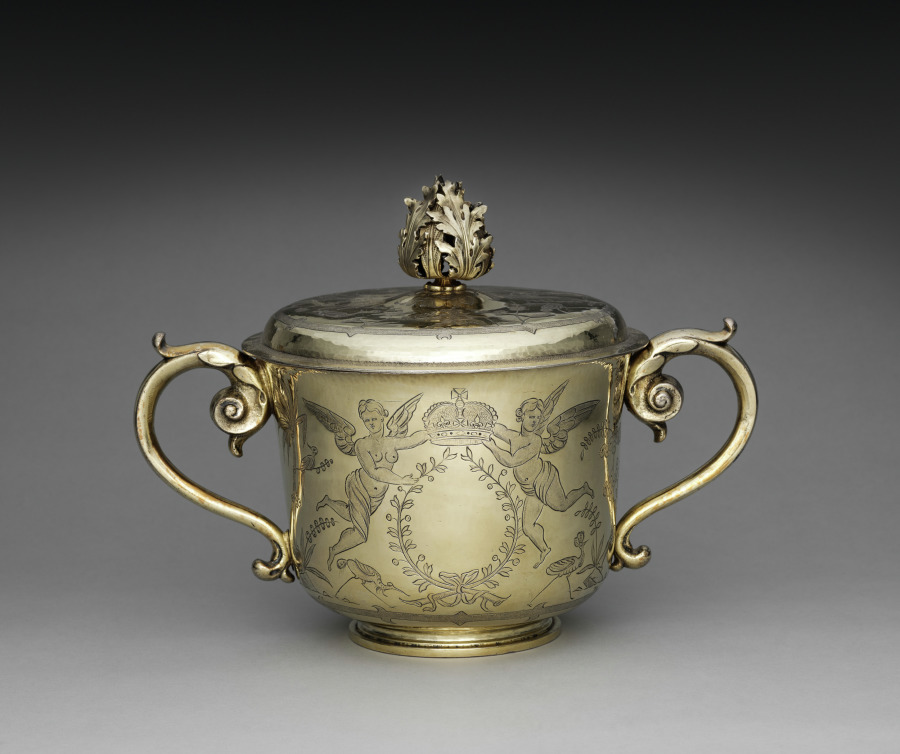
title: Two-Handled Cup and Cover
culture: England, London, 17th century (James II)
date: 1686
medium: silver gilt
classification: Silver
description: Produced a year after the coronation of James II (1633–1701), this silver cup celebrates the monarchy and reflects the political and social alliances that underpinned the aristocracy during the 1600s. During their coronation, James II and his second wife Mary of Modena (1658–1718) were carried through the city of London under a silk canopy adorned with motifs inspired by European perceptions of Chinese art, known as chinoiserie. Following the procession, the thirty-two lords involved in the ceremony were each offered a portion of the cloth from the canopy as well as sixteen troy ounces of silver from the posts. At least two of them commissioned cups adorned with chinoiserie to be made from the silver. While it is unclear if this cup once belonged to one of the thirty-two peers, it was almost certainly created in response to the same motifs and social developments.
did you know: The two female figures lift a crown on the front of this cup that closely resembles Saint Edward’s Crown, the heraldic emblem of the United Kingdom.